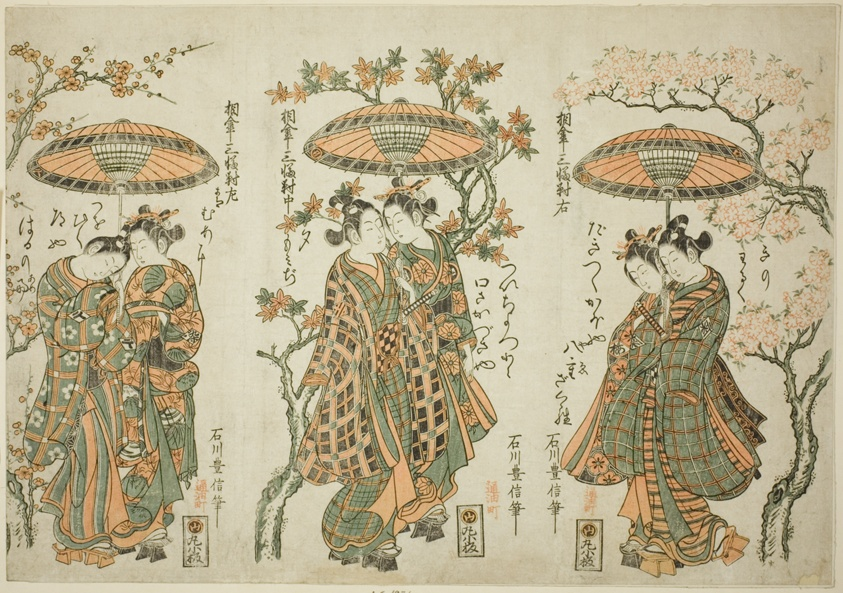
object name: Print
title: Sharing an Umbrella - A Set of Three (Aigasa sanpukutsui)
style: Japanese (culture or style)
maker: Ishikawa Toyonobu (Japanese, 1711-1785)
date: c. 1755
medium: Color woodblock print; uncut hosoban triptych, benizuri-e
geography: Japan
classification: woodblock print; print; asian art